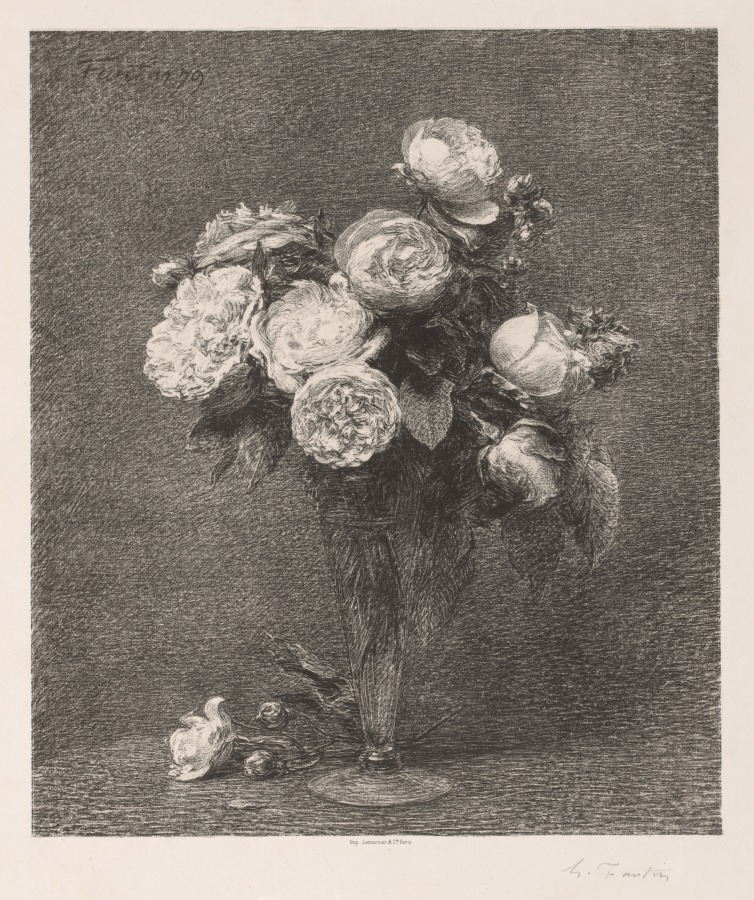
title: Bouquet of Roses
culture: France, 19th century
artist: Henri Fantin-Latour (French, 1836–1904)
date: 1879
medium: lithograph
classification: Print